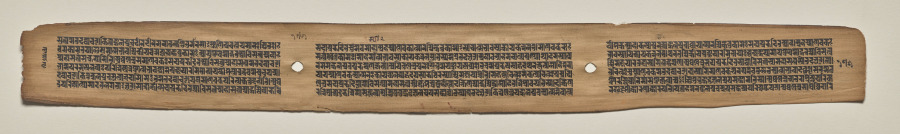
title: Text, folio 175 (verso), from a Manuscript of the Perfection of Wisdom in Eight Thousand Lines (Ashtasahasrika Prajnaparamita-sutra)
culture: Eastern India, Bihar, Vikramashila Monastery. Painting: Nepal, Kathmandu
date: Sunday, September 14, 1119 (year 239 of the Newar Samvat in the month of Ashvina)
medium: gum tempera and ink on palm leaves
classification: Painting